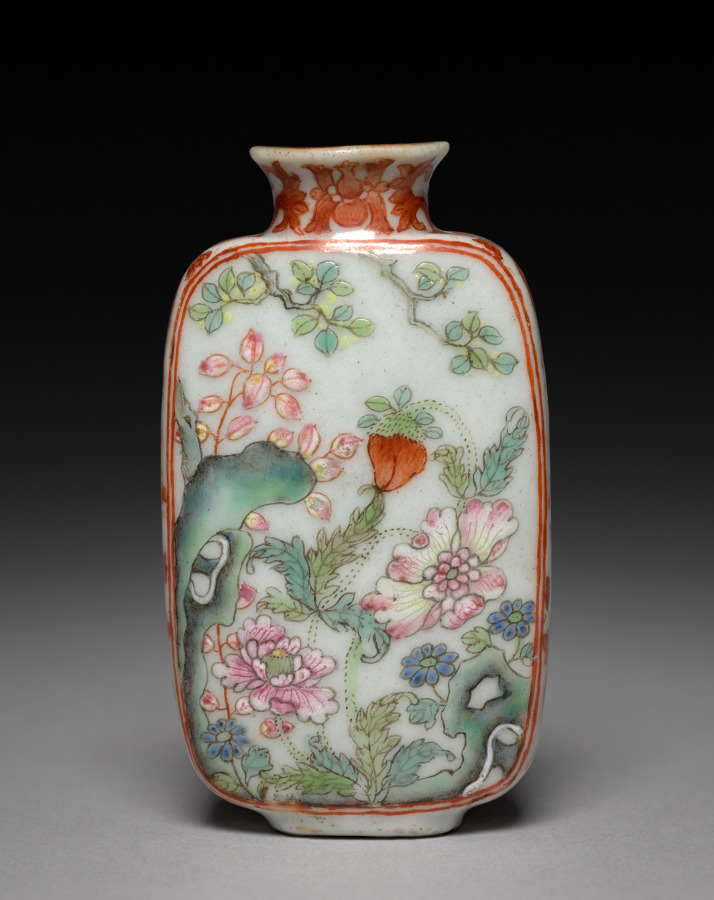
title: Snuff Bottle with Stopper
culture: China, Qing dynasty (1644–1911), Qianlong reign (1736–95)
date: 1736–95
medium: porcelain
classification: Ceramic